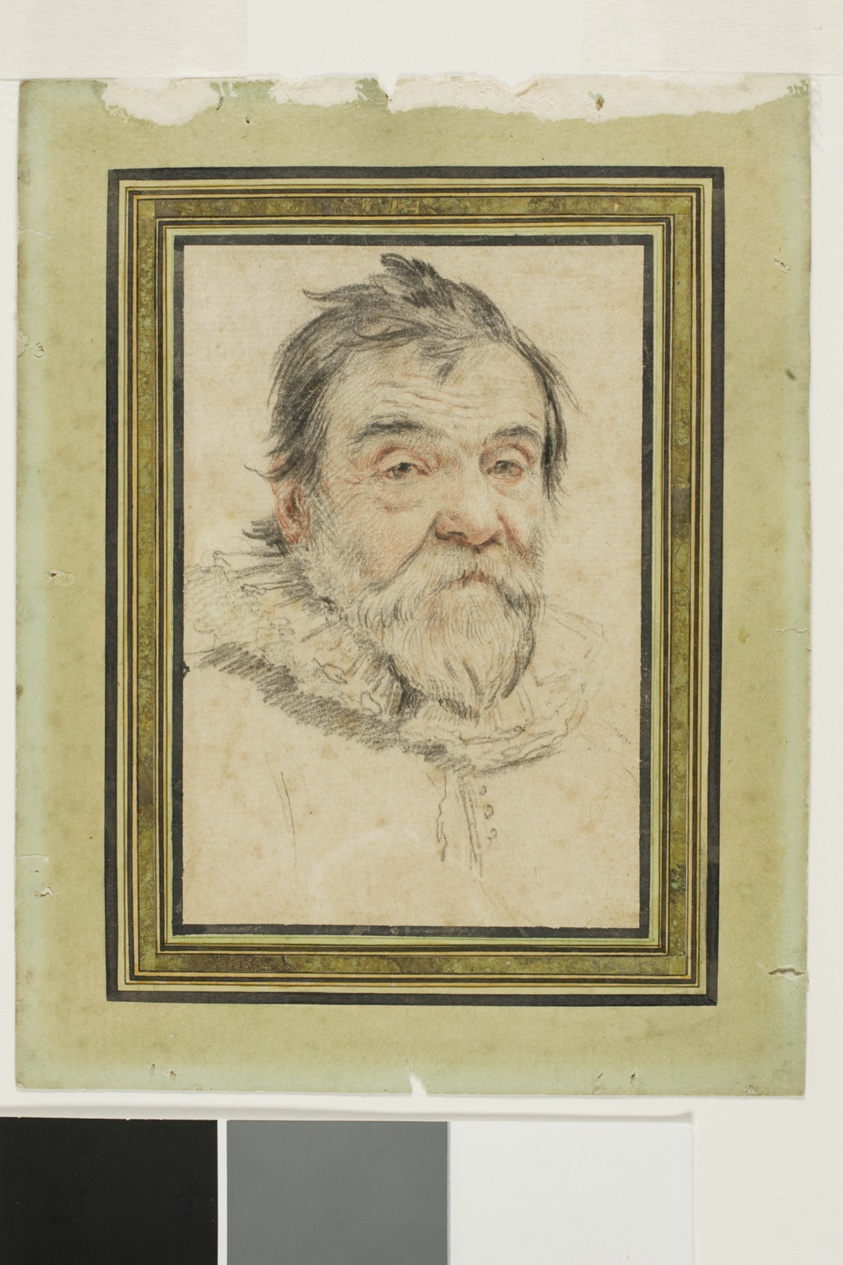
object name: Drawing and Watercolor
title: Portrait of a Bearded Old Man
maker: Attributed to Claude Mellan; French, 1598-1688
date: c. 1650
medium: Red and black chalk on buff laid paper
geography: France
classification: chalk; drawings (visual works); prints and drawing